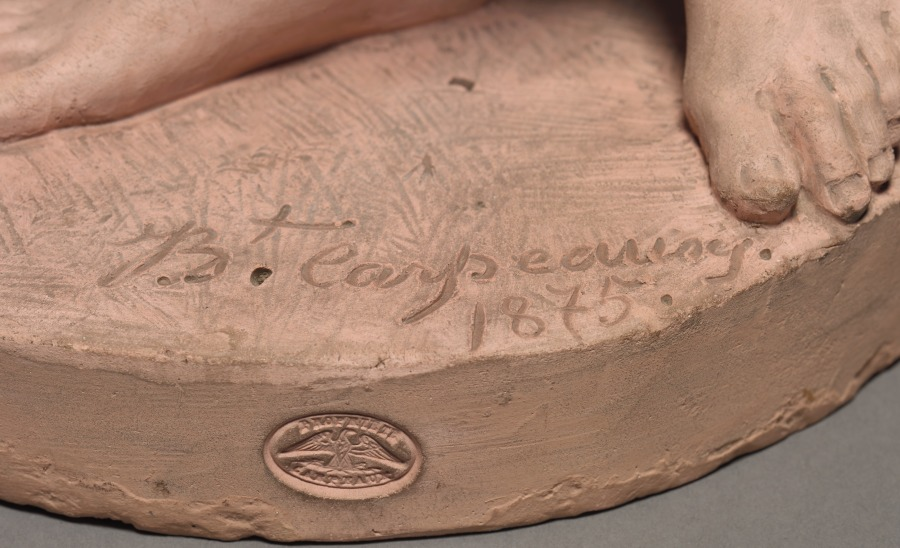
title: Brother and Sister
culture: France, 19th century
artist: Jean-Baptiste Carpeaux (French, 1827–1875)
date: 1875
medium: terracotta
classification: Sculpture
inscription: Signed "JBT" Carpeaux/1875" upper surface of base.